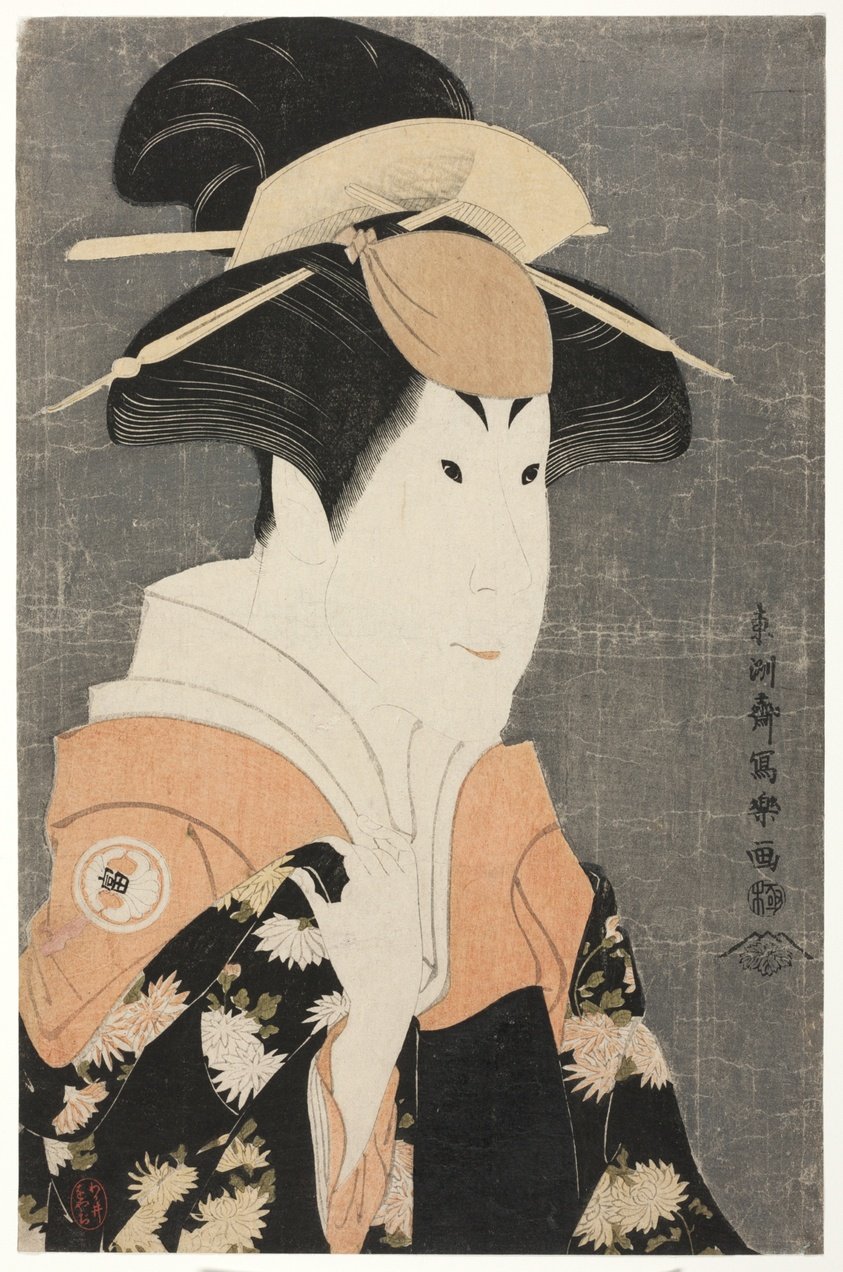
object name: Print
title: The actor Segawa Tomisaburo II as Yadorigi, wife of Ogishi Kurando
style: Japanese (culture or style)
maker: Toshusai Sharaku 東洲斎 写楽; Japanese, active 1794-95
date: 1794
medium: Color woodblock print; oban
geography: Japan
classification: woodblock print; print; asian art